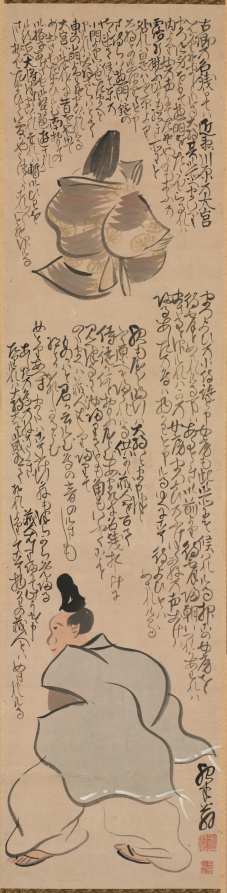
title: Moon Viewing, from The Tale of Heike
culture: Japan, Edo period (1615–1868)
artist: Yosa Buson (Japanese, 1716–1783)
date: 1700s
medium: hanging scroll; ink and light color on paper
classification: Painting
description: Drawing from Japanese literature, Yosa Buson copied almost the entire text of the “Moon Viewing” episode from The Tale of the Heike, a story of the rise and fall of the Taira family. The two characters he painted were given nicknames based on 31-syllable waka poems they composed. Seen from behind at the top is Matsuyoi, or “Waiting at Nightfall,” while the person striding below is Mono ka wa Kurando, roughly equivalent to “‘It’s Nothing’ Chamberlain.”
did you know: The Tale of the Heike is a great historical romance written around 1240.